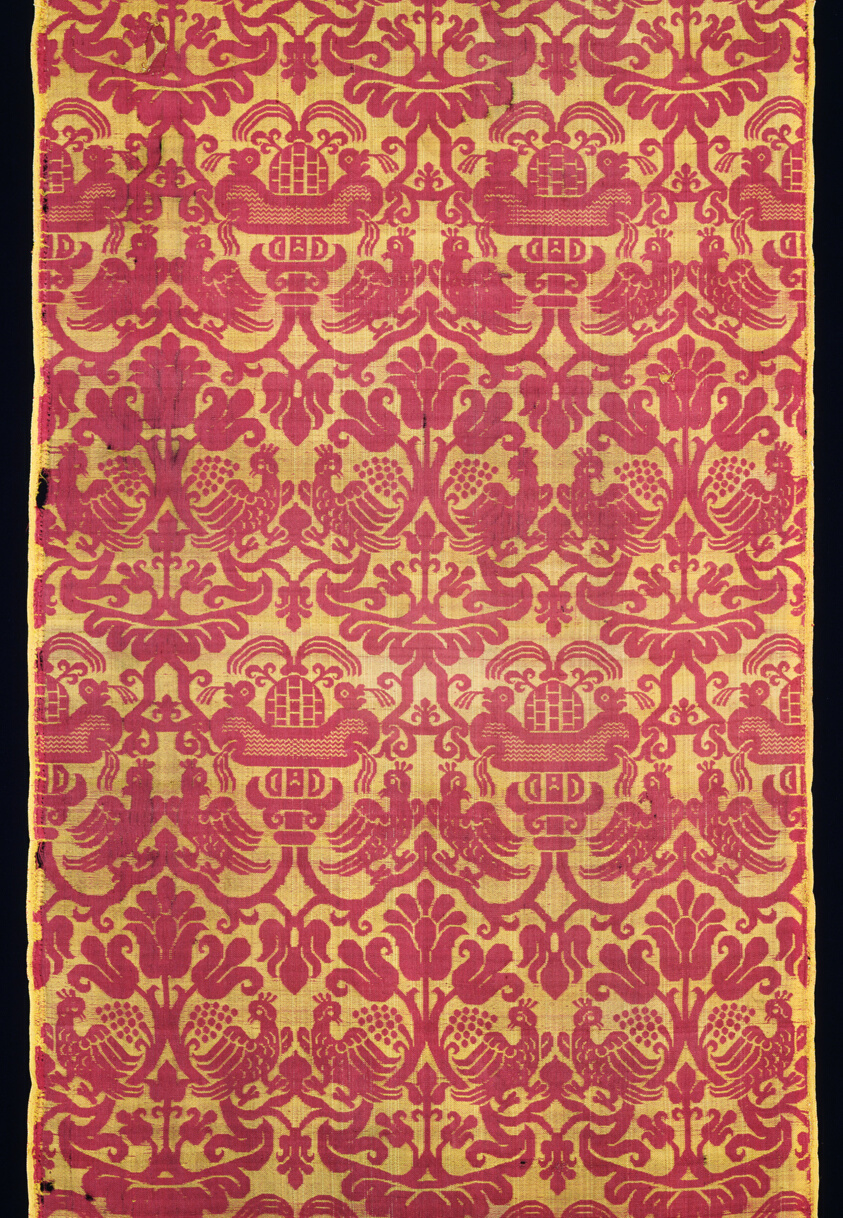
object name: Textile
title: Panel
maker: Italy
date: 1675/1725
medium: Silk, plain weave with supplementary patterning wefts; tied by binding warps in plain weave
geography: Italy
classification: textile; weaving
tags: floral arrangements, animals, circles, birds